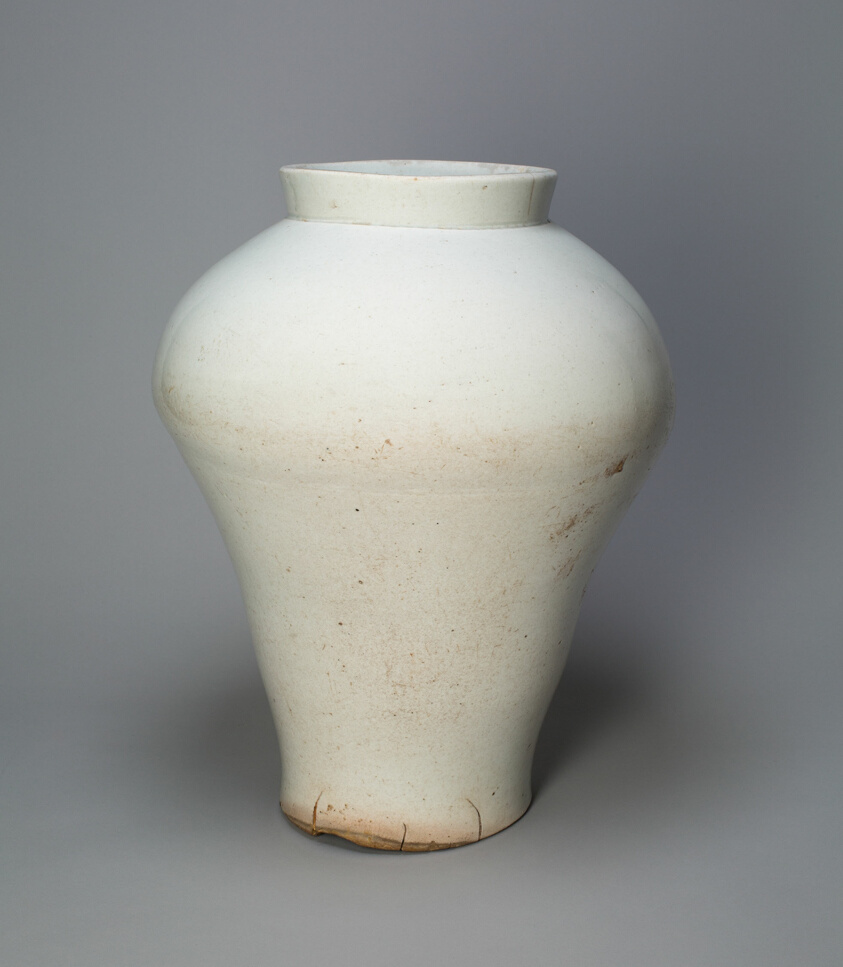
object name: Vessel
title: Jar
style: Korean (culture or style)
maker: Korea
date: Joseon dynasty (1392–1897), early 18th century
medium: Porcelain with glaze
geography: Korea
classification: stoneware; ceramics; asian art; vessel